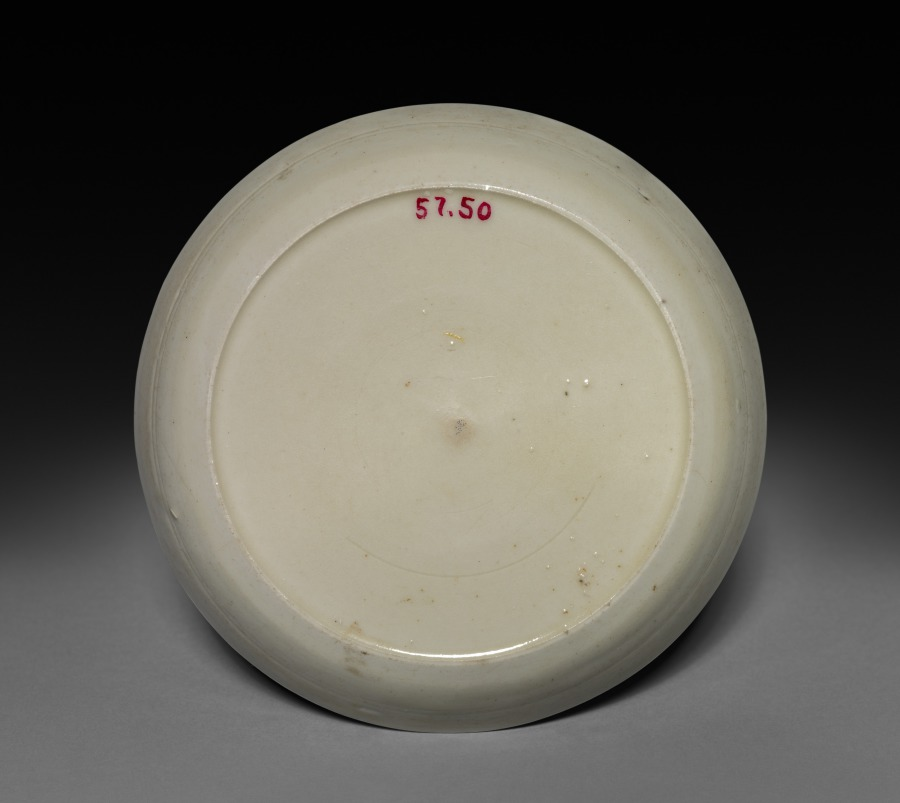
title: Dish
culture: China, Hebei province, Chuyang district, Jin dynasty (1115-1234)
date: 1100s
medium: White porcelain, Ding ware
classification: Ceramic